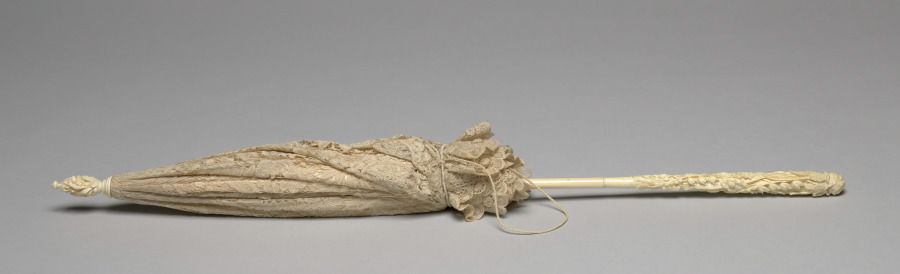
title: Lace Parasol with Ivory Handle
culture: Belgium, Brussels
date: 1880–99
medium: Needle lace and bobbin lace (Point Duchesse Lace) with carved ivory handle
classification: Lace